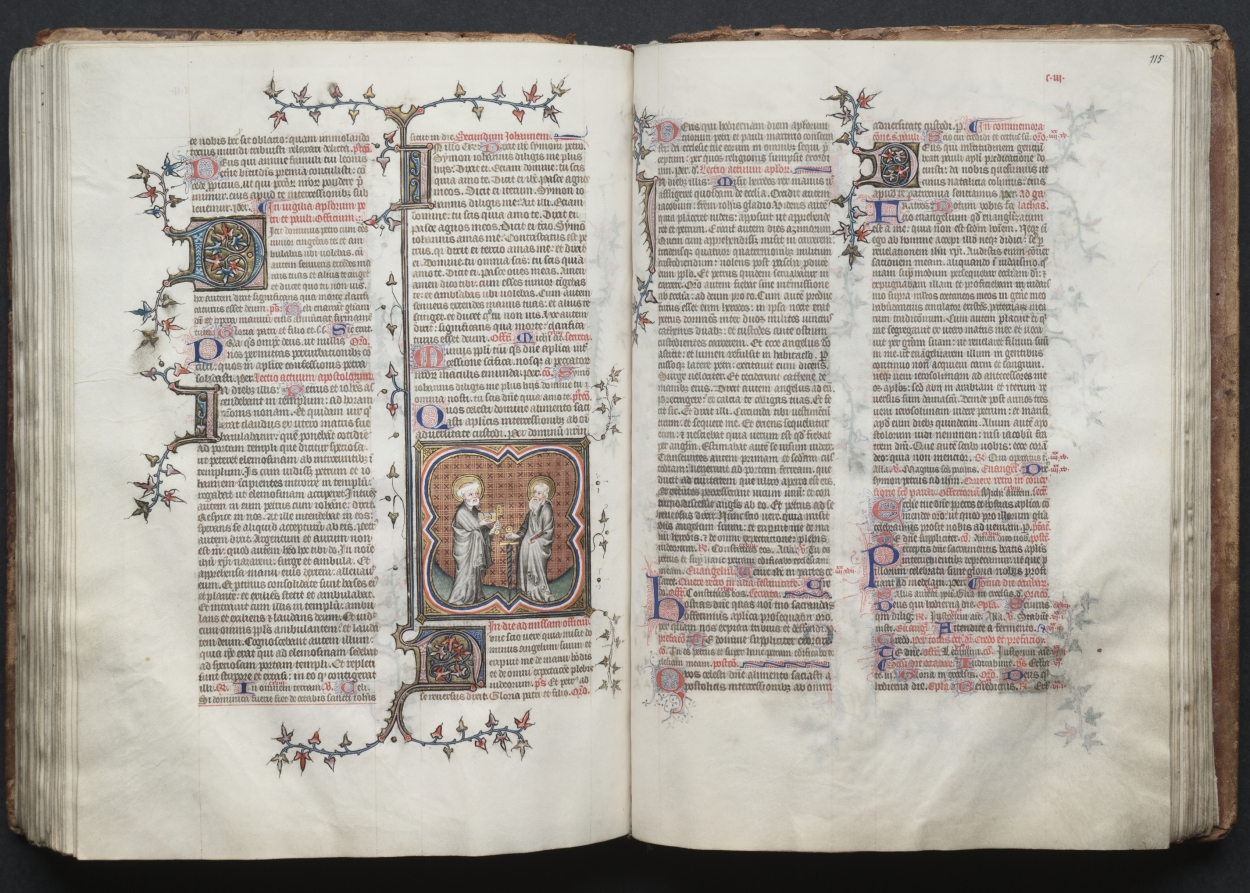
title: The Gotha Missal: Fol. 114v, St. Peter and Paul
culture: France, Paris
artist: Master of the Boqueteaux (French)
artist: and Workshop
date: c. 1375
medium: ink, tempera, and gold on vellum; blind-tooled leather binding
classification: Bound Volume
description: The style and quality of this manuscript's decoration is typical of deluxe Parisian books made for aristocratic or royal patrons. Most of the book's decoration appears to be the work of the Master of the Boqueteaux, an artist active at the court of King Charles V (died 1380). His style was apparently shared by a number of book illuminators working in and around Paris. It is very possible that the Gotha Missal belonged to Charles V, but is not provable because the manuscript has no royal portraits and lacks a colophon. Given the book's magnificent decoration, however, it would seem that it was produced for a Valois prince, if not for the king himself. The manuscript receives its name from the German dukes of Gotha, its later owners.